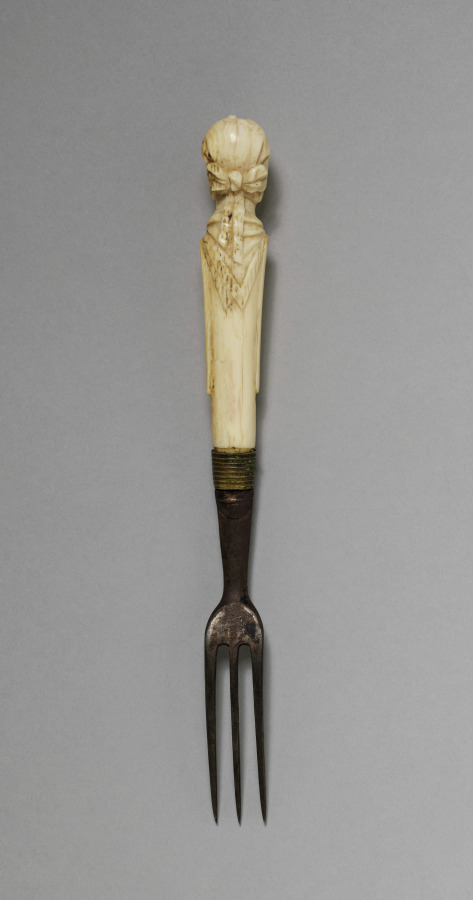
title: Fork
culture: Italy, 18th century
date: 1700s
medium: metal end, ivory handle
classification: Ivory